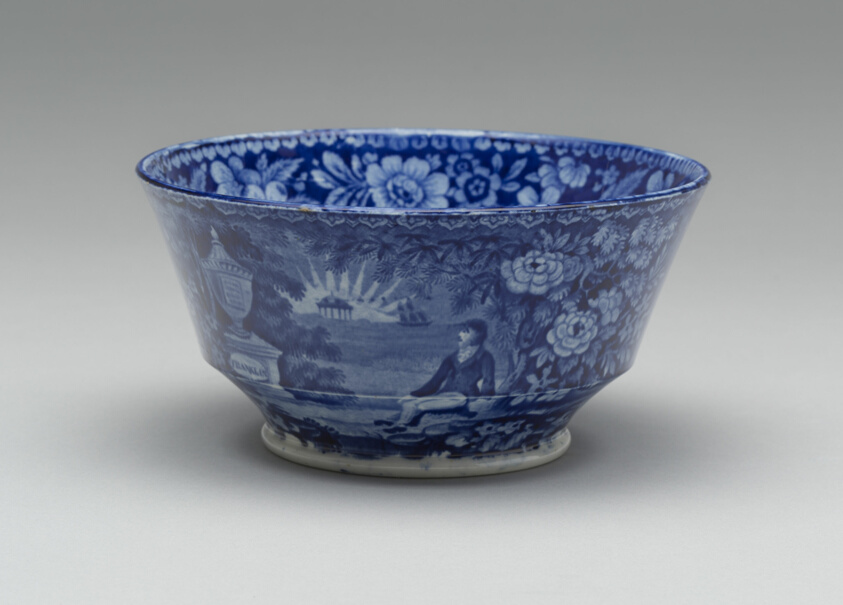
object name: Decorative Arts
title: Bowl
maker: Enoch Wood & Sons; English, active 1818–1846; Made for the American market; Staffordshire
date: 1825–30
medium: Earthenware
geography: Burslem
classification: bowl; earthenware; american decorative arts; ceramics; decorative arts